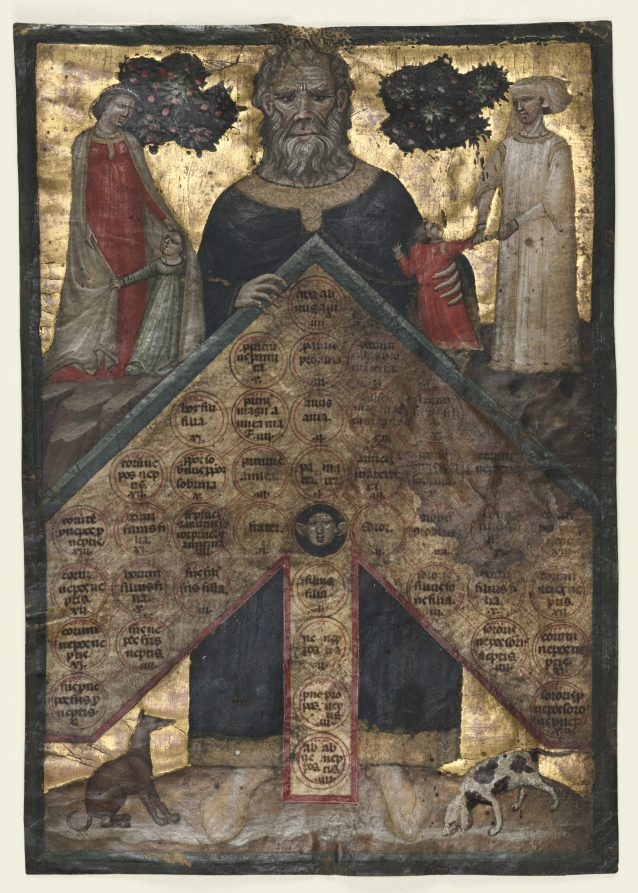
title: Leaf from a Volume of Johannes Andrea's "Lectura super arboris consanguinitatis et affinitatis: Table of Consanguinity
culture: Italy, Bologna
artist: Master of the Register of 1328 (Italian)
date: c. 1331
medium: tempera and gold on parchment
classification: Manuscript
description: The two leaves shown here come from Johannes Andrea's widely circulated treatise on marriage impediments. The writer lived until 1348 and is known as the most learned of the lay canonists of the Middle Ages. He taught for nearly 50 years at the University of Bologna, where his lectures on both canon and Roman law made him famous.